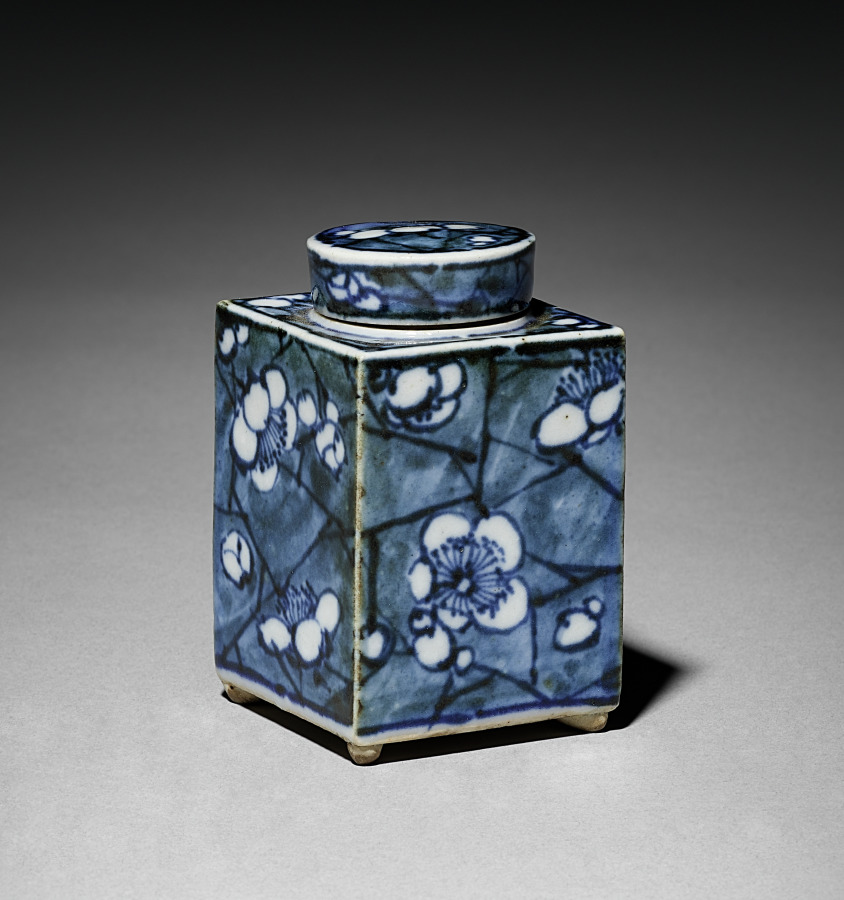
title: Tea Container with Plum Blossom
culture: Japan, Edo period (1615–1868)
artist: Aoki Mokubei (Japanese, 1767–1833)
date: early 1800s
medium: porcelain with underglaze blue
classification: Ceramic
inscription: signed "Ro Mokubei" on base in underglaze blue.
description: Aoki Mokubei, born into a family of restaurateurs, was a potter, calligrapher, painter, and scholar, and is considered one of the three masters of later Edo period Kyoto ceramics. He specialized in porcelains fashioned after Chinese prototypes, and created works for steeped tea (sencha) such as these matching tea caddies decorated in an underglaze blue called sometsuke—literally “with applied dye.” He signed them on their bottoms. They also have intricately patterned silk sleeves to both beautify and protect them. On the exterior of the lid of the outer wooden box that contains them, it is written that Mokubei inscribed and painted an image on the box. On the interior of the lid, the signature and seals of a former owner are written. Mokubei has signed the lid of the inner box, and a charming ink and light color composition of West Lake in Hangzhou in China covers its three sides. On the fourth side is a long inscription by Mokubei describing the scene.